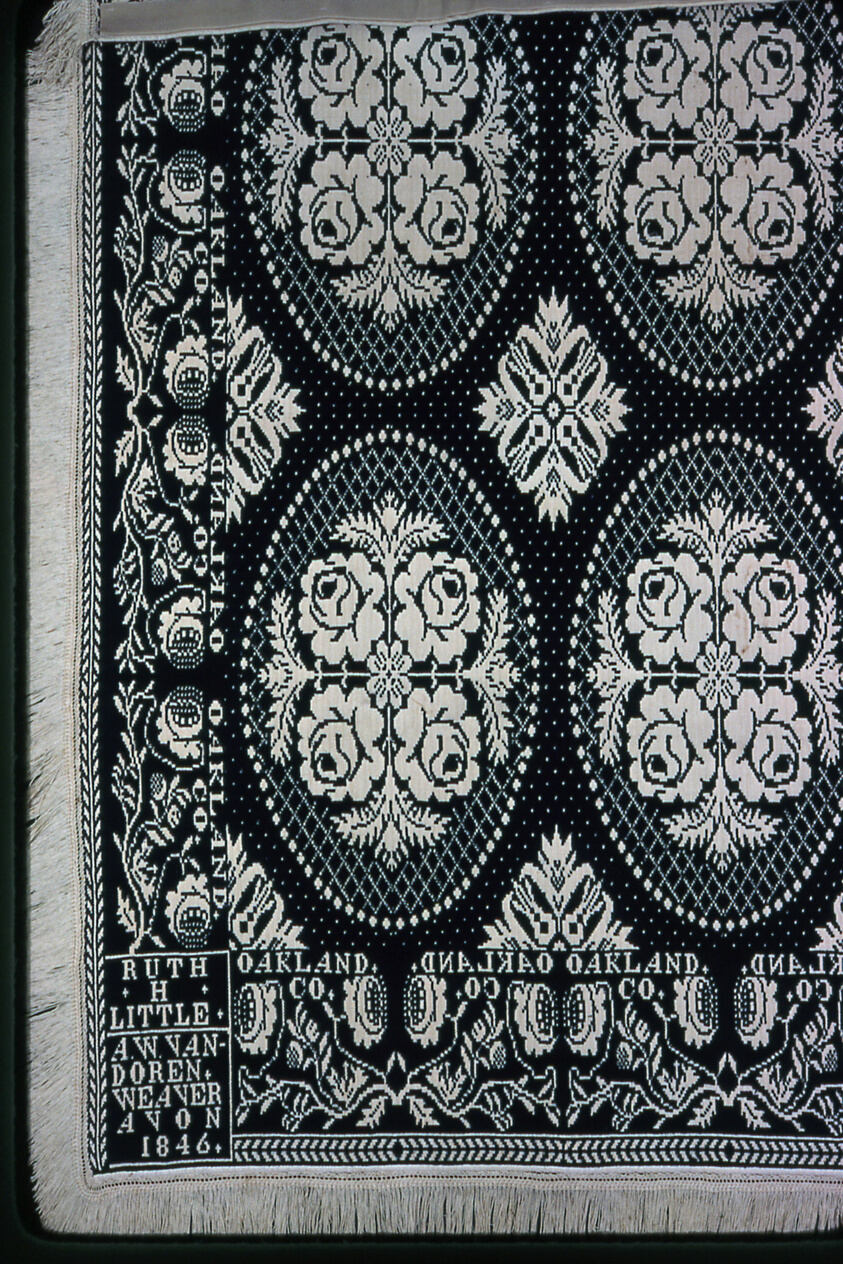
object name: Textile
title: Coverlet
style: 19th century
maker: Abram William Van Doren (American, 1808-1884); Michigan, Oakland County, Avon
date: 1846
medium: Cotton and wool, plain weave double cloth; woven on loom with Jacquard attachment; cotton, machine-knit fringe; two loom widths joined; all selvages present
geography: United States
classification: weaving - coverlet; coverlet; weaving; textile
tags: medallions, vines, flowers, roses, coverlet